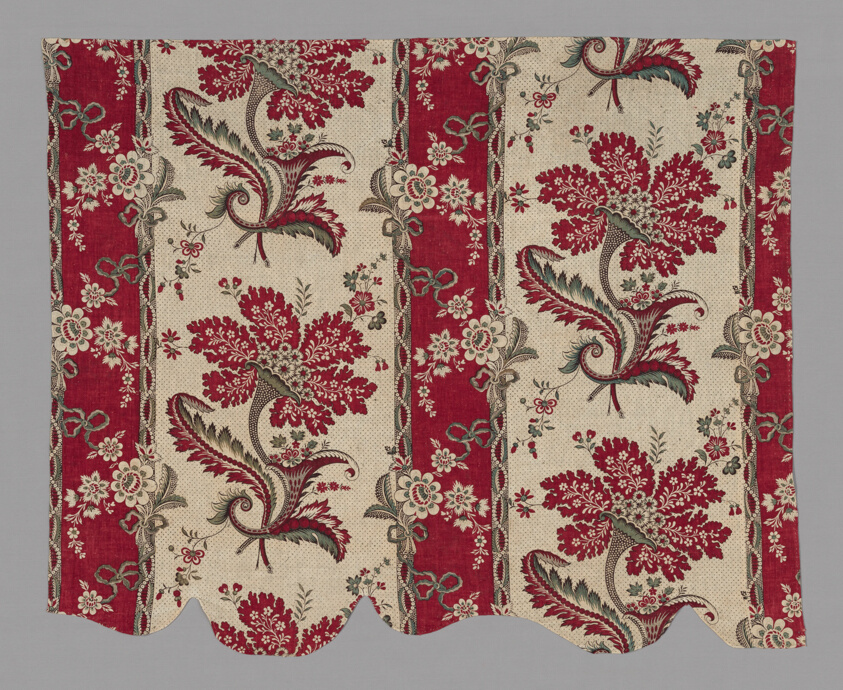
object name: Textile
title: The Flowering Cornucopia (La Corne Fleurie)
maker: Printed and produced by J. P. Meillier et Cie; France, Bordeaux, Beautiran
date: After 1789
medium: Cotton, plain weave; block printed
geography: Bordeaux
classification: textile; weaving - printed; printed textile